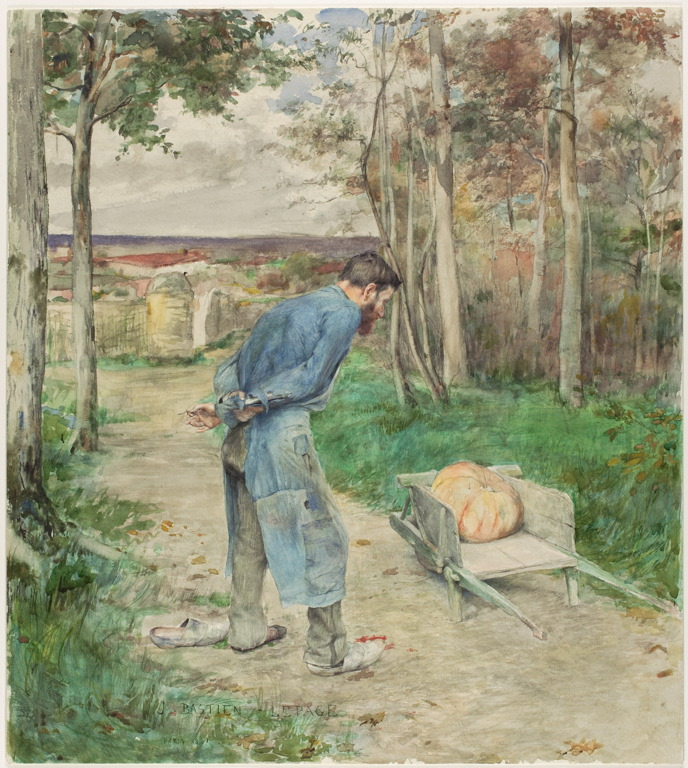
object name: Drawing and Watercolor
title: The Acorn and the Pumpkin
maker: Jules Bastien-Lepage (French, 1848-1884)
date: 1881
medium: Watercolor on ivory wove card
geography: France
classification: watercolor; drawings (visual works); prints and drawing